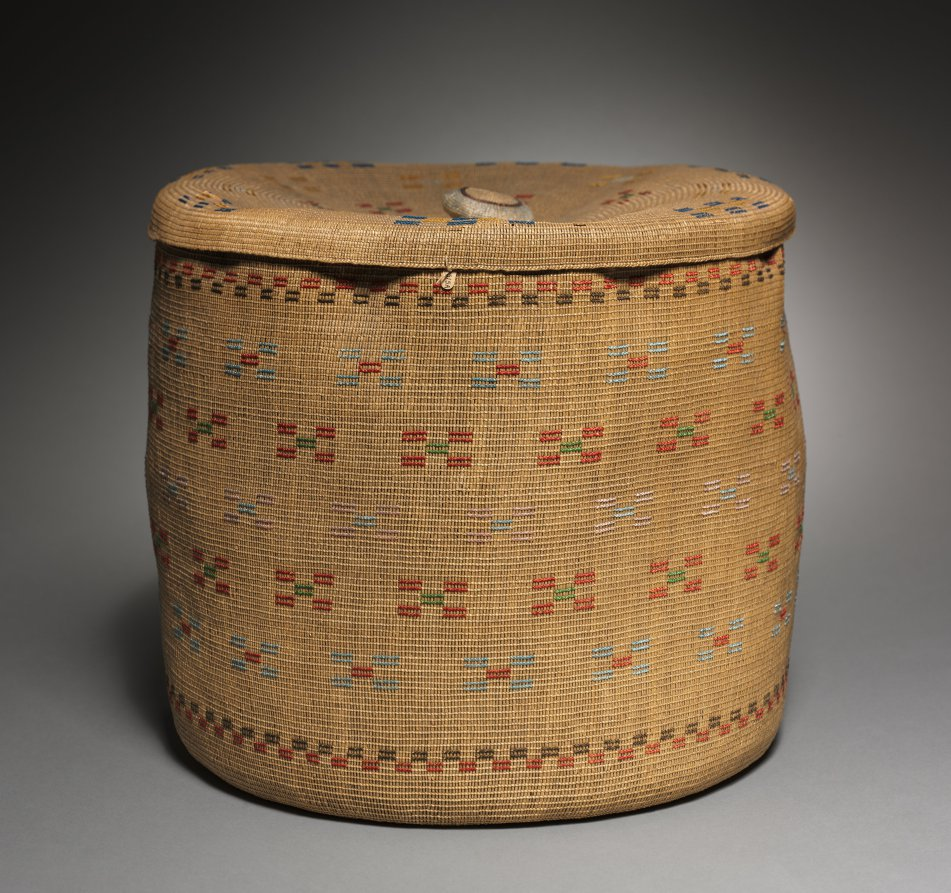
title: Covered Twined Cylindrical Basket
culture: Arctic. Aleut (Attu), late 19th-early 20th century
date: late 1800s–early 1900s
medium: twined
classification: Basketry